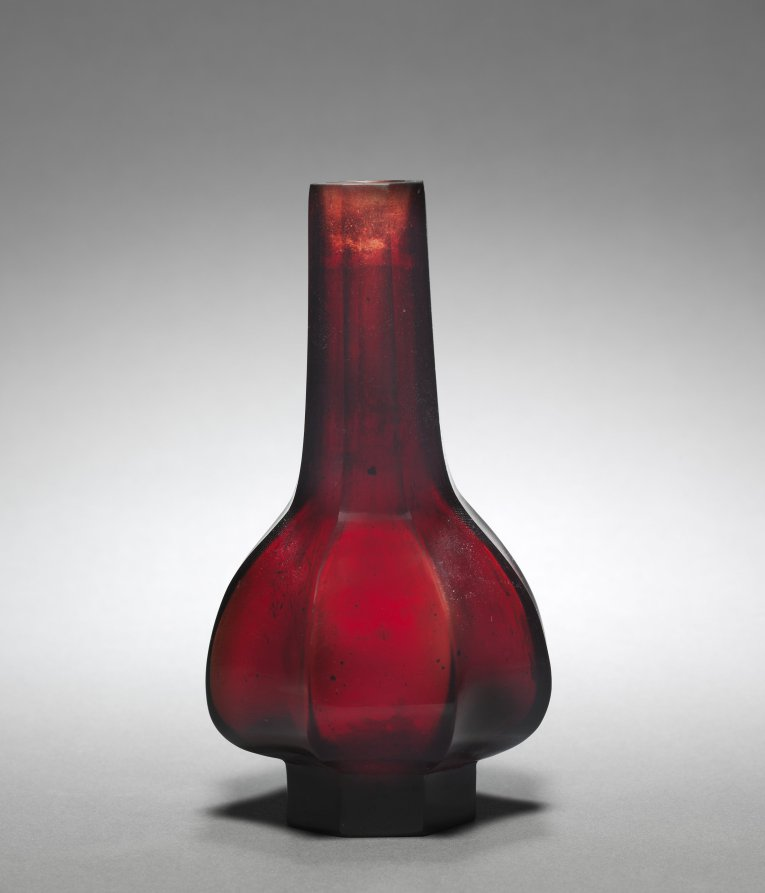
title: Faceted Bottle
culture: China, Qing dynasty (1644-1911), Qianlong mark and reign (1736-95)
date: 1736–95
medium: red Peking glass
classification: Glass